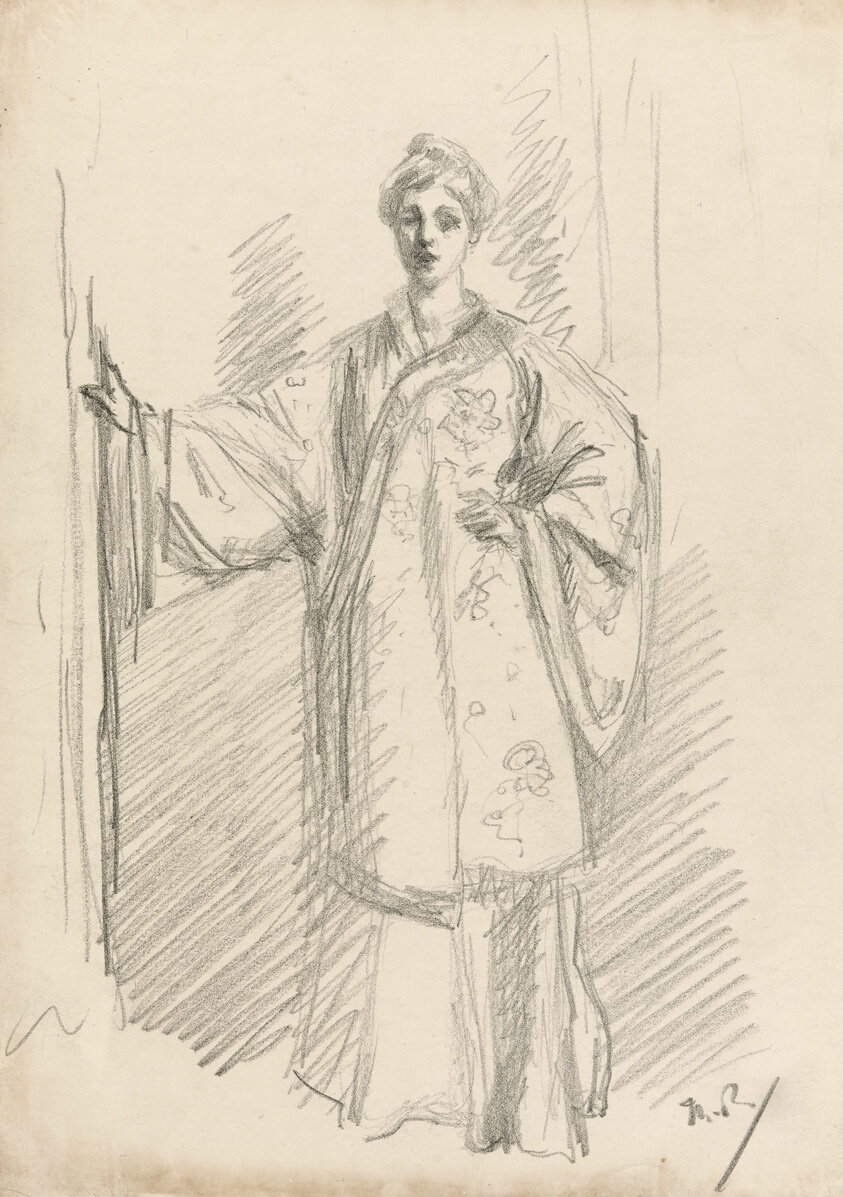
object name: Drawing and Watercolor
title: Standing Figure in a Chinese Gown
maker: Theodore Roussel (French, worked in England, 1847-1926)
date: 1890–94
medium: Lithographic crayon on fine-grained transfer paper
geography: England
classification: lithograph; prints and drawing; paper